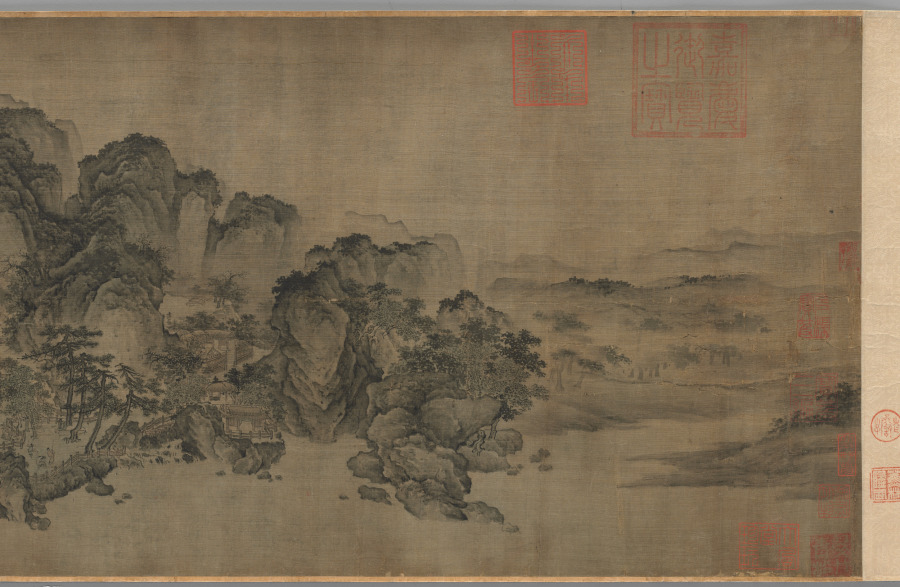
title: Streams and Mountains without End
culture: China, late Northern Song dynasty (960-1127) - Jin dynasty (1115-1234)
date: 1100–1150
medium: handscroll; ink and slight color on silk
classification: Painting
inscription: 9 colophons and 48 seals: 1 colophon, dated 1205, of Wang Wenwei 王文蔚 (dates unknown); 1 colophon, dated 1205, of Li Hui 李惠 (dates unknown); 1 colophon of Weiluo Tian Xie 蔚羅田獬 (dates unknown); 1 colophon, dated 1214, of He Yan 何言 (dates unknown); 1 colophon, dated 1326, of Cao Yuanyong 曹元用 (d. 1329) 1 colophon, dated 1332, of Kangli Zishan 康里子山 (Naonao; 1295-1345); 1 colophon, dated 1336, of Liu Zai 劉載. (dates unknown); 1 colophon, dated 1380, and 4 seals of Yang Mao 楊懋 (1300-after 1380); 4 seals of the Hou family (ca. 1340); 1 colophon of Wang Duo 王鐸 (1592-1652); 4 seals of Zhang Bingqian 張秉乾 (juren of 1729); 8 seals of Liang Qingbiao 梁清標 (1620-1691); 2 seals of the Qianlong emperor (r. 1736-95); 4 seals of the Jiaqing emperor (r. 1796-1820); 3 seals of the Xuantong emperor (r. 1909-11); 2 seals of Ye Gongchuo 葉恭綽 (1881-1968); 17 seals of Zhang Yuan 張爰 (Zhang Daqian 張大千, 1899-1983).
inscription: Colophon 1. Wang Wenwei 王文蔚. Dated third month and third day, 1205, under the reign of Zhangzong of the Jin dynasty. 造物元無心，山川秀氣聚。畫手亦無盡，各出新意度。 誰將妙林泉，淡墨寫縑素。重巒疊嶂間，三兩人家住。 茅舍隔素籬，小橋通細路。溪上數葉舟，雅有物外趣。 嵓崦藏招提，依稀認窗戶。山色四時宜，雲煙自朝暮。 不知塵世中，此景在何處。收拾買山錢，投老好歸去。 泰和乙丑三月三日平原王文蔚謹再拜，書于河東縣署之野趣堂。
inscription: Colophon 2. Li Hui 李惠. The colophon was written three days before the Qingming Festival in 1205. 畫師慣在山中居，含毫吮墨聊自娛。 閑將一段冰霜絹，寫出千里江山圖。 前山後山互出沒，山腰林樾相縈紆。 危橋澗溜瀉鳴玉，山根一匯為平湖。 波平短艇快漁釣，雲深細徑來樵蘇。 僊宮梵宇占幽勝，雕欄複閣森蓬壺。 往來行客煙靄外，飄飄野店青帘孤。 人家雞犬聲相接，熙熙化日安唐宇。 嗟余嗜好何其迂，膏肓泉石真吾徒。 一行作吏墮世網，薄書汨沒勞奔趨。 千巖萬壑但夢想，故園三徑應將蕪。 披圖暫洗黃塵眼，拊膺三嘆空踟躕。 泰和乙丑清明前三日絳臺李惠書于舜城府署之九思堂。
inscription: Colophon 3. Weiluo Tian Xie 蔚羅田獬. 畫工紛紛不可紀，擺脫俗流幾人耳。 夫誰援筆掃鵝溪，一段風煙且千里。 白波青嶂渺無窮，水接山兮山插水。 小橋野店相勾連，古寺樓臺突兀起。 飄然氣象與神俱，但患未明孰姓氏。 郭熙雖老典型存，為問主公無乃是。 此畫世希當寶藏，無與碌碌同一視。 更看卷首數公詩，奇絕清新相表裏。 蔚羅田獬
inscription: Colophon 4. He Yan 何言. Written in 1214. 萬有來自無，一真歸所託。畫師得三昧，胸中幻丘壑。 百態逐墨破，群形隨筆落。地近迹分明，天遙痕隱約。 雲物自吐吞，峯巒非斧鑿。江鄉閴無市，谷關常不鑰。 中有野夫閑，童琴而歩鶴。酒斾出籬懸，漁舟臨岸泊。 澗樹蔽橋樑，巖松迷殿閣。岑疊宿霧重，野曠林煙薄。 危棧接縈紆，亂泉通脈絡。途中人往來，僕馬何羸弱。 怪石虎踡跼，古木龍蟠錯。一幅宜好收，千金非易博。 玉堂閑卷舒，眼界增寥廓。視險尚寛平，見危除慘虐。 氣象溢國華，川澤資廟略。功名業已書，歸去鞭先著。 但知色即空，何是今非昨。飽乎仁智心，箇中無限樂。 貞祐甲戌秋暮，東營何言題。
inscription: Colophon 5. Cao Yuanyong 曹元用 (d. 1329). Dated 1326. 岸擁危橋斷，溪浮小艇斜。 萬山最深處，依約兩三家。 泰定丙寅秋，曹元用題。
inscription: Colophon 6. Kangli Zishan 康里子山 (i.e., Kangli Naonao). The colophon bears a date of 1332. 右溪山圖，意韻蕭灑。一見使人有烟霞之想，真可珍藏。又有□金諸名勝題詩其左。兵火之餘， 殊不易得也。 至順三年暮春之月，康里子山跋。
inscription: Colophon 7. Liu Zai 劉載. 雲拂埜田閑種玉，雨餘巖溜碎傾金。 幾時也結團茆去，麟閤恬然不挂心。 至元二年正月，長安劉載載之謹錄上。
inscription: Colophon 8. Yang Mao 楊懋 (1300–after 1380). 觀此圖，經營位置，筆法高古，山明石潤。其橋梁、路道、樹林、人物、遠近；一一誠得真山水之深趣。非當時名筆有大才者不能至此。不必問其誰何，可為神品。况宋金元三朝名公所跋，尚不能記，想其來尤遠矣。然而物經累變而尚存，是物之有壽者也。余不復再論。文顯其保之。洪武庚申春，八十翁楊懋觀。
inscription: Colophon 9. Wang Duo 王鐸 (1592–1652). 文蓀親翁博雅，文詩鴻暢。舍弟持此喜觀，遂抽管題數語： 山勢委折，筆墨無痕。宋人中如此不多見也。譬之兵家，當是韓白。王鐸。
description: Streams and Mountains without End was a landmark acquisition of 1953, made just a year after Sherman Lee had returned to Cleveland as curator of Oriental art. He acquired it with the intention to provide "a more than adequate foundation for a fine collection of Chinese landscape painting." This impressive work demonstrates the culmination of stylistic developments in Chinese monumental landscape painting following the Northern Song tradition. It represents a journey through a landscape, making it a fitting metaphor for Lee’s journey of discovery and achievement over a lifetime.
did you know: The portrayal of the distant lands is rich with details like pavilions, villages, and human activities.